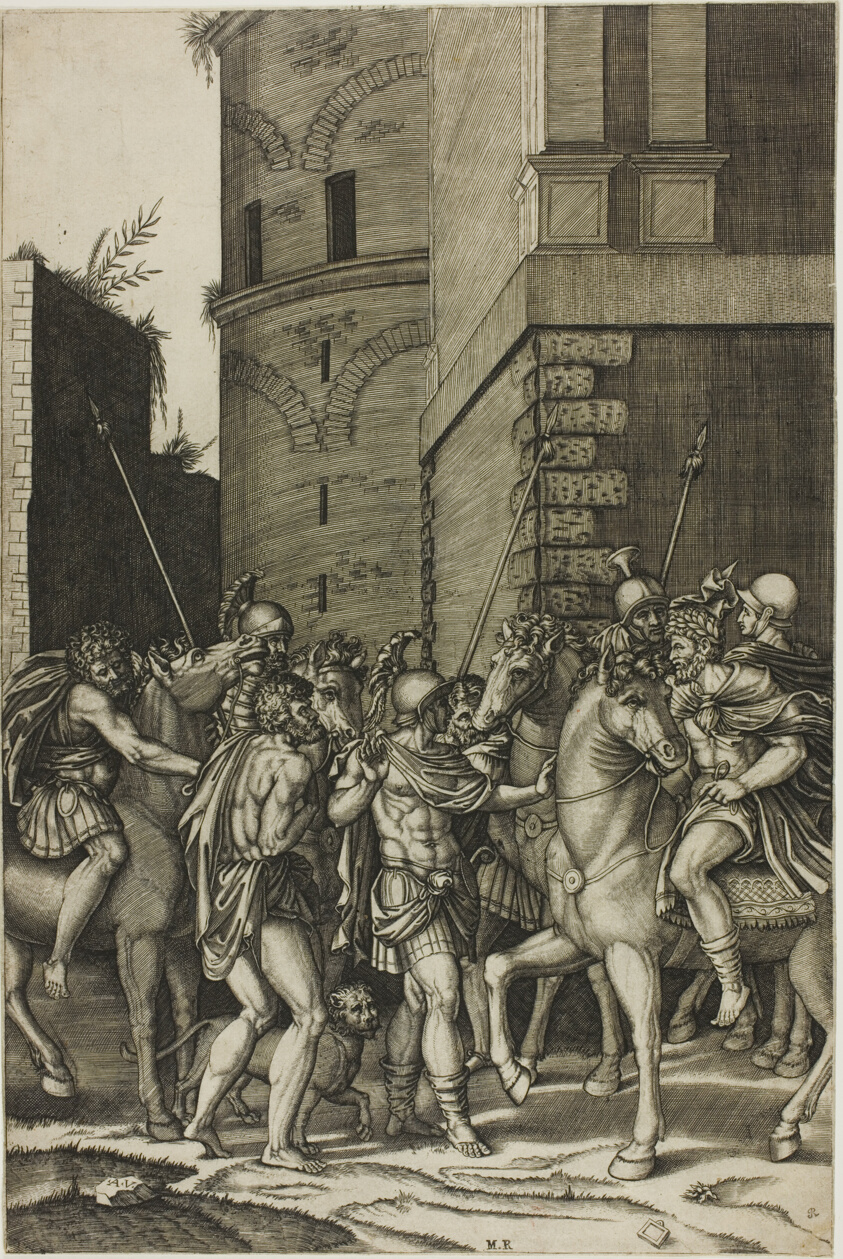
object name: Print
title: Emperor Freeing the Slave Androcles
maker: Agostino dei Musi (Italian, c. 1490-after 1536)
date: 1516/17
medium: Engraving in black on ivory laid paper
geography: Italy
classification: engraving; print; prints and drawing